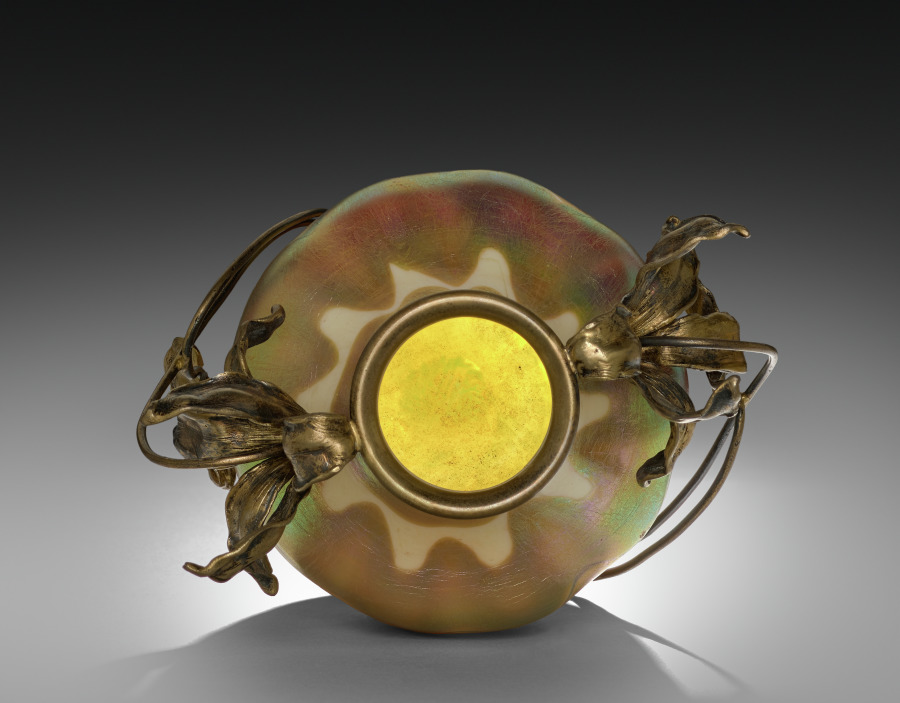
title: Vase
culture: America, New York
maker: Tiffany Glass & Decorating Company (America, New York, 1892–1902)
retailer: Siegfried Bing (German, active in France, 1838–1905)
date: c. 1900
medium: Favrile glass, silver mount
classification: Glass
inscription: Louis C. Tiffany o10301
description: This small vase is made of Louis Comfort Tiffany's signature Favrile glass. Early on when Tiffany began collaborating with glass artists on new types of production, his aesthetic ambitions were realized in the development of Favrile glass, deliberately named to sound French, expensive, and “handmade.” Largely through Tiffany's marketing ability, Favrile glass became America’s greatest contribution to the Art Nouveau style. His works were exhibited at international expositions; galleries in major European cities, where his creations were bought by many museums; and in his store in Manhattan, known as the Tiffany Glass and Decorating Co., later Tiffany Studios. Along with the many shapes and sizes of his decorative vases, Tiffany used Favrile glass in mosaic panels, stained glass windows, and his artistic line of table and floor lamps.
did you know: This vase has French mounts indicating that it was likely sold by Louis Comfort Tiffany's agent in Paris, Siegfried Bing, who helped popularize Tiffany's designs throughout Europe.